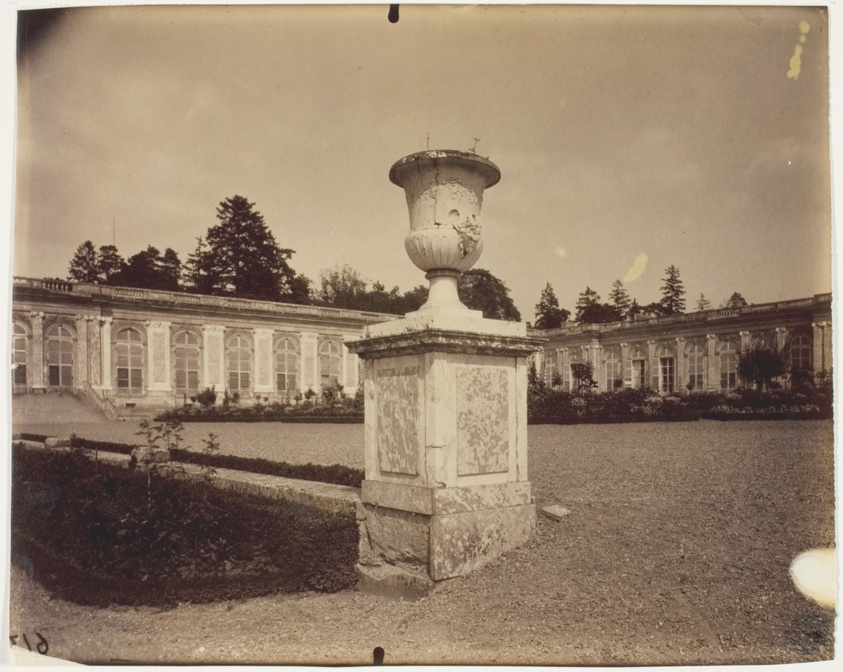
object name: Photograph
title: Versailles, Grand Trianon, (Le Parc)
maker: Jean-Eugène-Auguste Atget (French, 1857–1927)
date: 1901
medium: Albumen print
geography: France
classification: albumen silver print; photographic process; photography; photograph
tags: Collected by Hugh Edwards